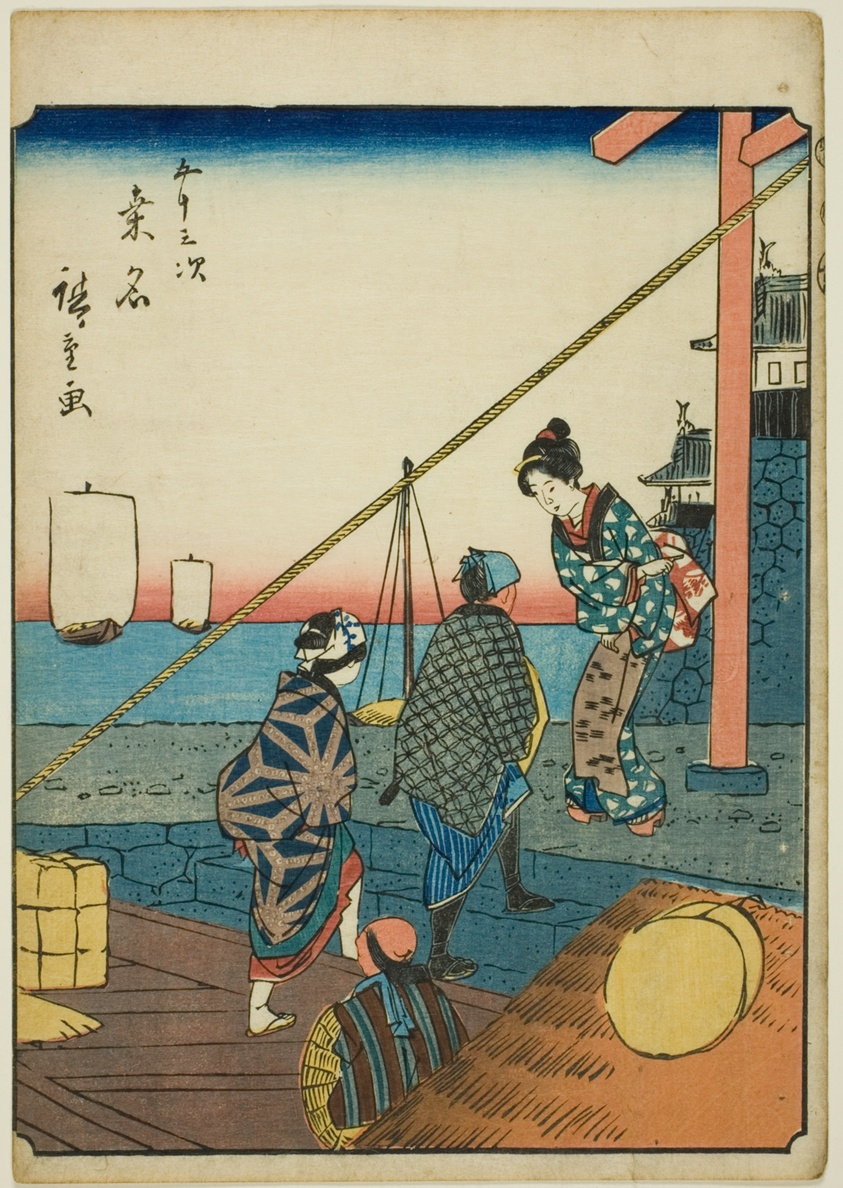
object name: Print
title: Kuwana, from the series "Fifty-three Stations [of the Tokaido] (Gojusan tsugi)," also known as the Figure Tokaido (Jinbutsu Tokaido)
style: Japanese (culture or style)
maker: Utagawa Hiroshige 歌川 広重; Japanese, 1797-1858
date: 1852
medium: Color woodblock print; chuban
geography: Japan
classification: woodblock print; print